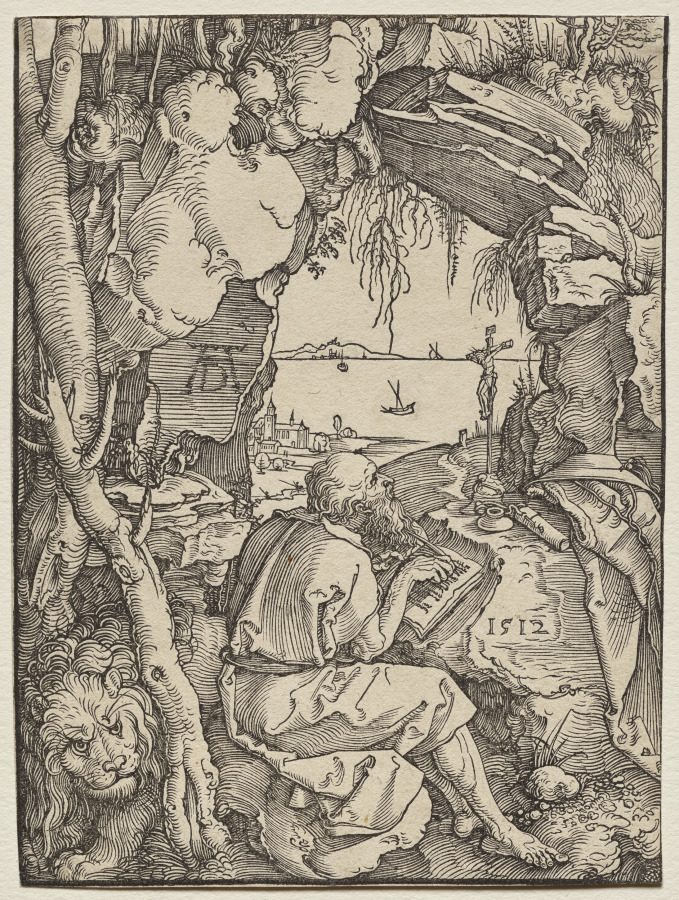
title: St. Jerome in a Cave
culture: Germany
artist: Albrecht Dürer (German, 1471–1528)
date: 1512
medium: woodcut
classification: Print